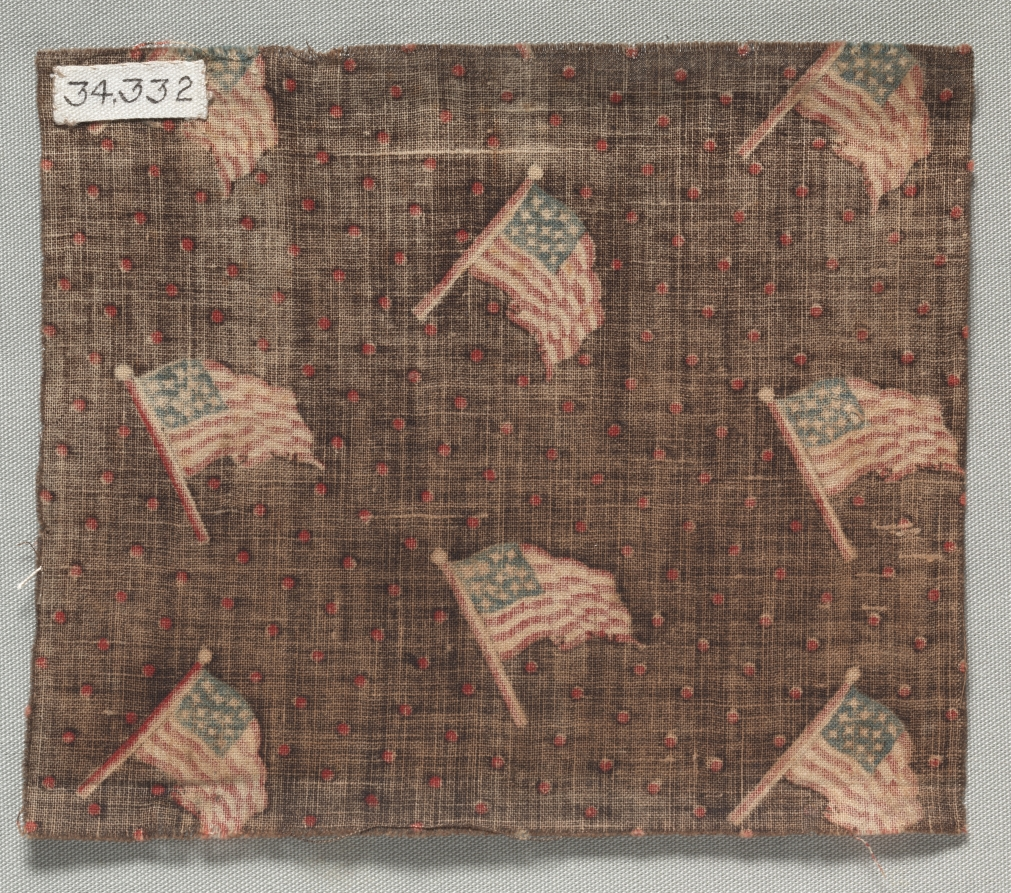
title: Textile Fragment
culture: America, early 19th century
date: early 19th century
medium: printed cotton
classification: Textile